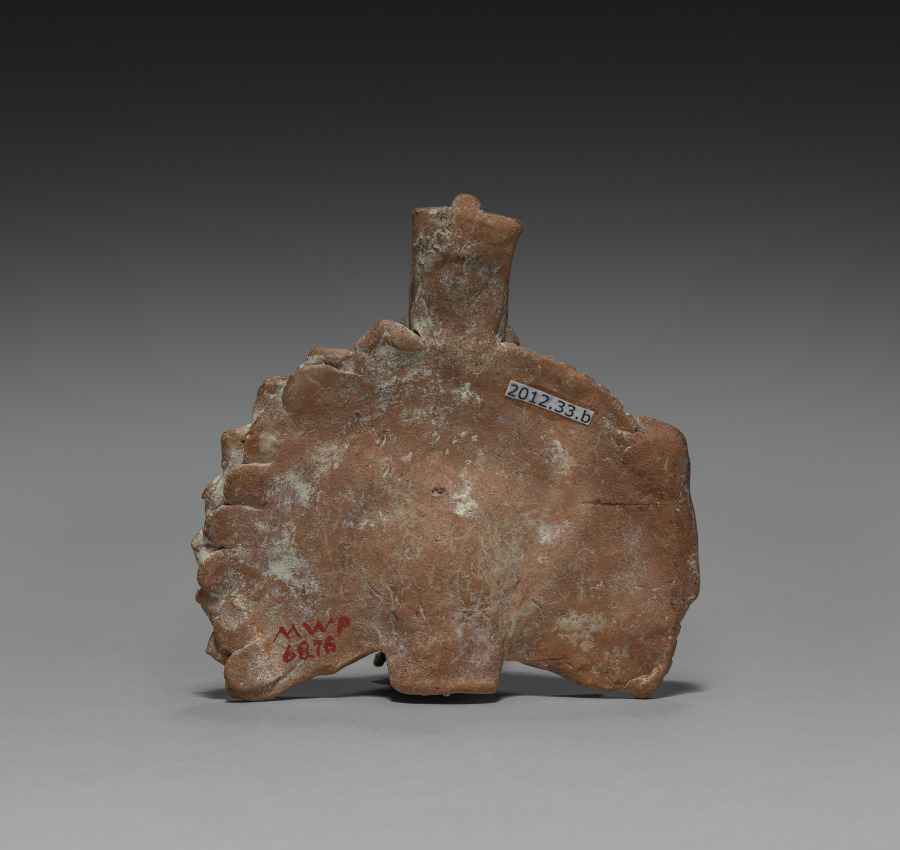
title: Seated Lord with Removable Headdress: Headdress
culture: Mesoamerica, Maya, probably Jaina Island, Late Classical period, 7th-9th century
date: 600–800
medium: ceramic and slip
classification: Ceramic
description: The major Maya grave offerings on Jaina Island were ceramic figurines that depict deities and humans in a variety of roles. The headdress belongs to a seated figure who represents a male, perhaps another warrior, who wears a huge zoomorphic headdress. A skeletal face with articulated jaw descends from the headdress to fit as a mask over the figure’s face.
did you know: It is estimated that some 20,000 people were buried on the tiny island of Jaina over a 500-year period.